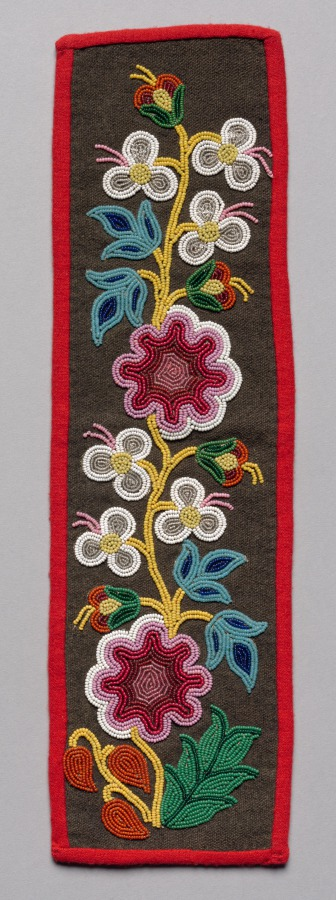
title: Beaded Panel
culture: Northeast Woodlands, Great Lakes Region, Anishinaabe (Ojibwe) or Nehiyawak (Cree) People?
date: late 1800s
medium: glass beads on wool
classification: Textile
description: In the 1800s, native peoples began to use European fabrics to fashion fine formal garments; they favored sturdy cloth, such as velvet and wool broadcloth, which provided support for heavy decorative beadwork that was added by hand. Often the fabric was a dark color, providing dramatic contrast for the multicolored beads. Rather than encrusting the entire garment, beadwork was confined to cuffs, “epaulettes,” bib-like plackets and yokes, rectangular panels sewn to leggings, shirts, and dresses, and the like.